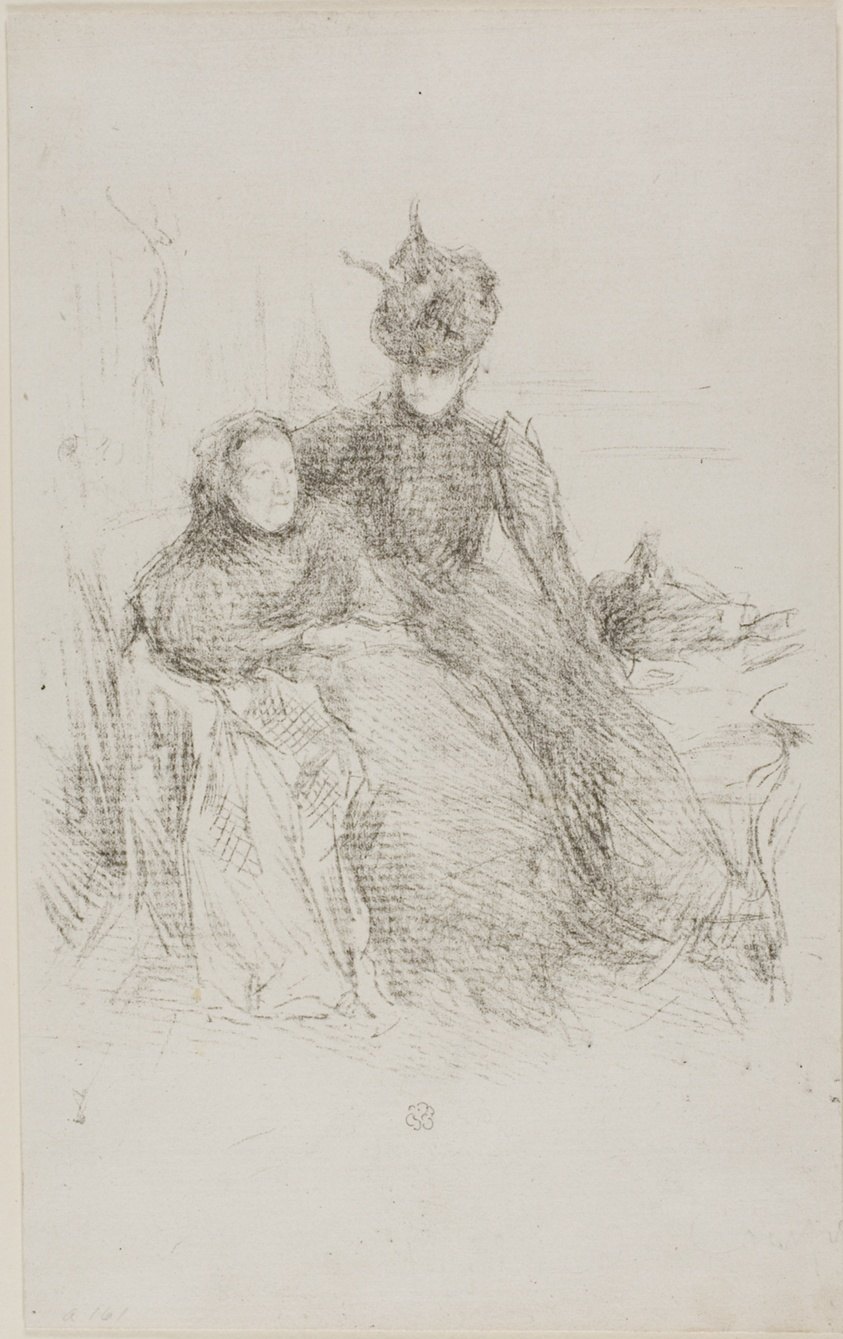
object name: Print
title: Mother and Daughter [La Mère Malade]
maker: James McNeill Whistler (American, 1834-1903)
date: 1897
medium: Counterproof of transfer lithograph with stumping, in black, on off-white wove paper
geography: United States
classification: transfer lithograph; paper; lithograph; print; prints and drawing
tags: mothers, daughters